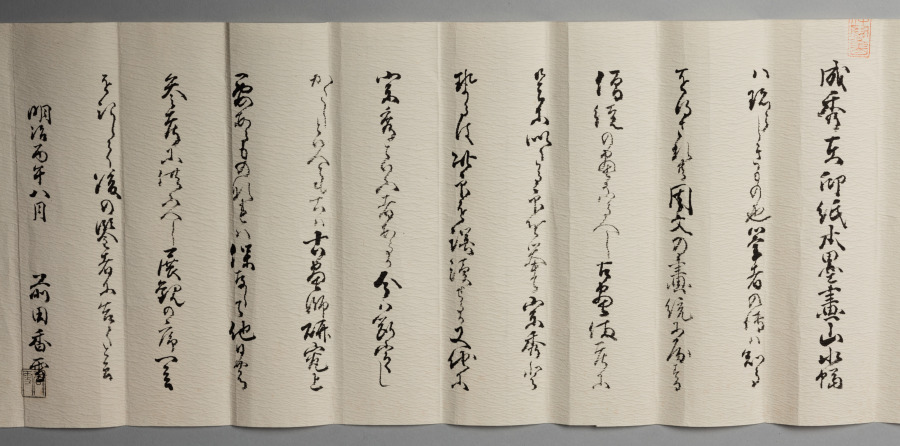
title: Landscape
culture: Japan, Muromachi period (1392–1573)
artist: Narihide (Japanese, active 1500s)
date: 1500s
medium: hanging scroll; ink on paper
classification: Painting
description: This composition includes imagery from the Eight Views of the Xiao and Xiang Rivers. Scanning the composition from top to bottom, at least six of the views are discernible: night rain over Xiao and Xiang, evening bell from a mist-shrouded temple, returning sails off a distant shore, geese descending to a sandbar, mountain village in clearing mist, and sunset glow over a fishing village. Inside the painting’s box is a document with a long inscription by prominent calligrapher, collector, and connoisseur Maeda Kōsetsu (1841–1916) discussing the painting’s subject and the matter of the painter’s biography—he appears to have been a Kano school artist, but his precise identity is unclear.